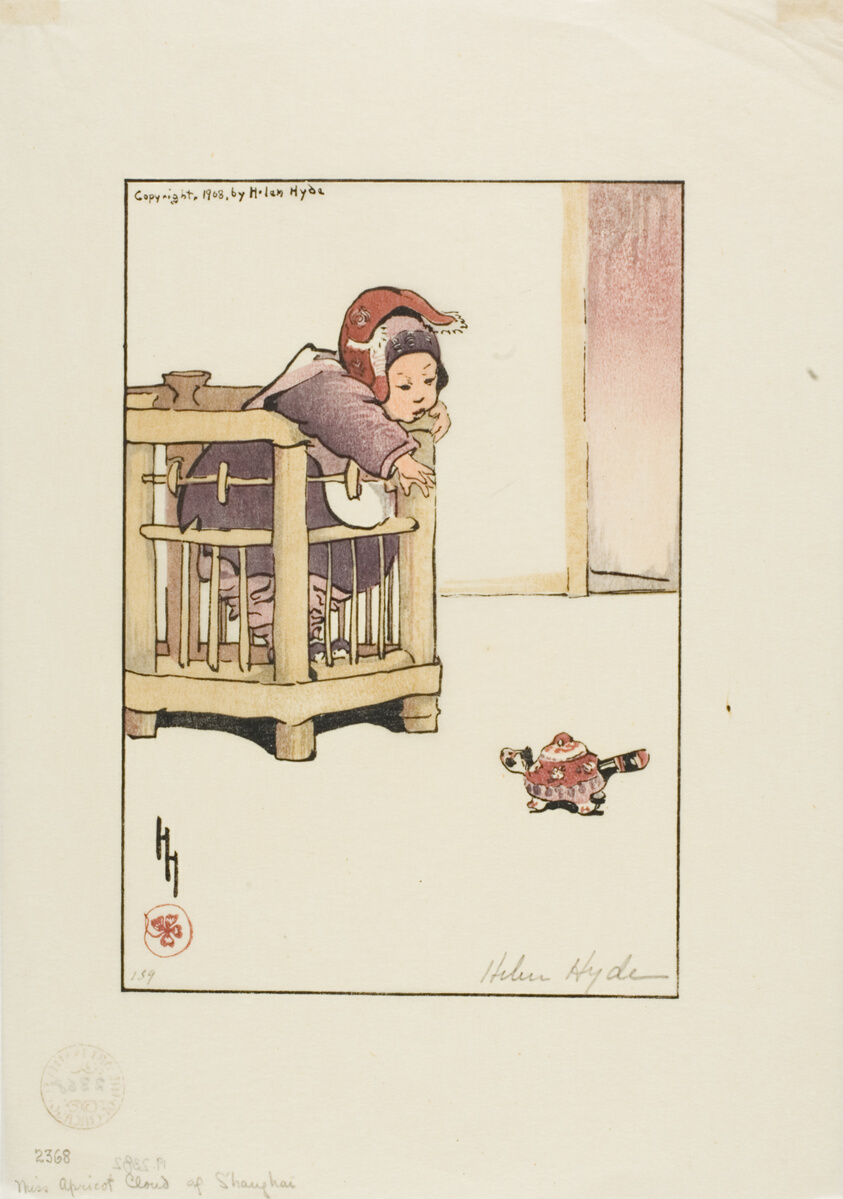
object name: Print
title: Miss Apricot-Cloud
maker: Helen Hyde (American, 1868-1919)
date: 1908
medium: Color woodcut on ivory Japanese paper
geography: United States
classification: woodcut; print; prints and drawing